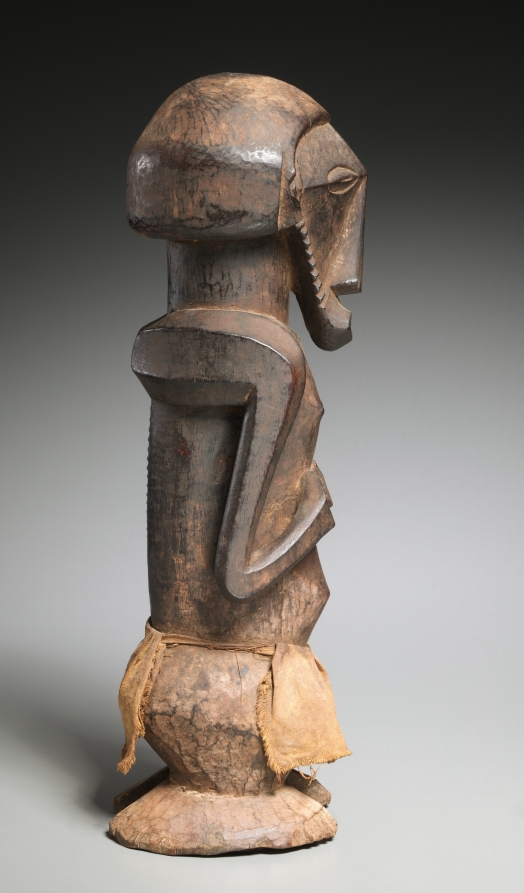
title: Shrine Figure (misi or mishi)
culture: Africa, Central Africa, Democratic Republic of Congo, pre-Bembe style or Boyo-style maker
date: late 1800s-early 1900s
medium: Wood and cotton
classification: Sculpture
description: This figure was used in an ancestral cult dedicated to the founders of small political groupings. Such figures were usually kept in the same shrine with a number of stylistically related male and female carvings that represented ancestors. At times of crisis, the custodian of the shrine spent the night in close proximity to the images, bringing offerings to the ancestors in exchange for their support.